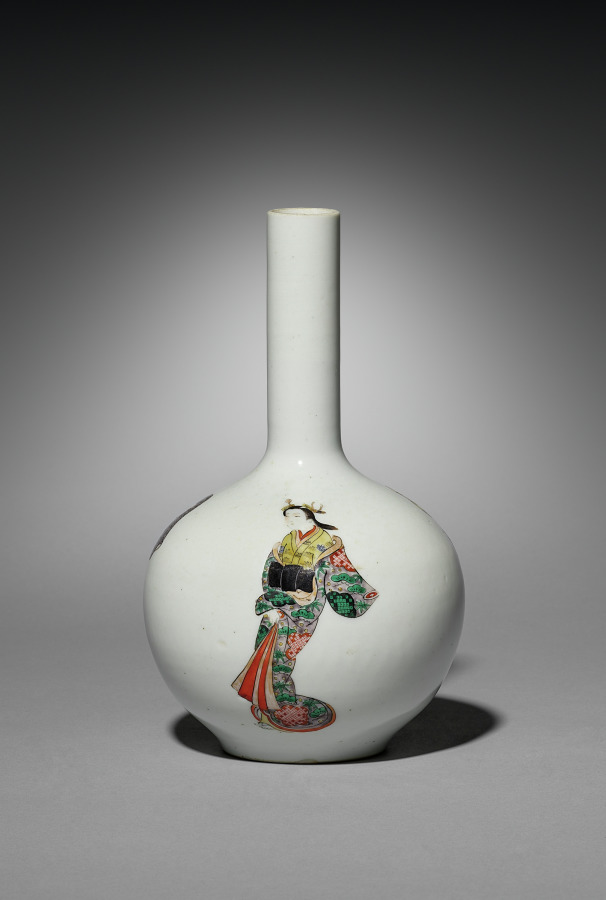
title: Sake Bottle with Three Figures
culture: Japan, Edo period (1615–1868)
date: late 1700s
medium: porcelain with overglaze enamel and gold decoration (Hizen ware, Arita type)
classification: Ceramic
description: The bottle features three elegantly drawn figures: a beautiful woman, a young man, and a priest. The artist used a fine-haired brush to draw these figures in colored enamel onto the porcelain bottle, which had already been given a clear glaze. A final firing fused the enamel to the form. The name derives from the port of Imari from where Japanese porcelains were shipped to other cities in Japan, China, and Europe.